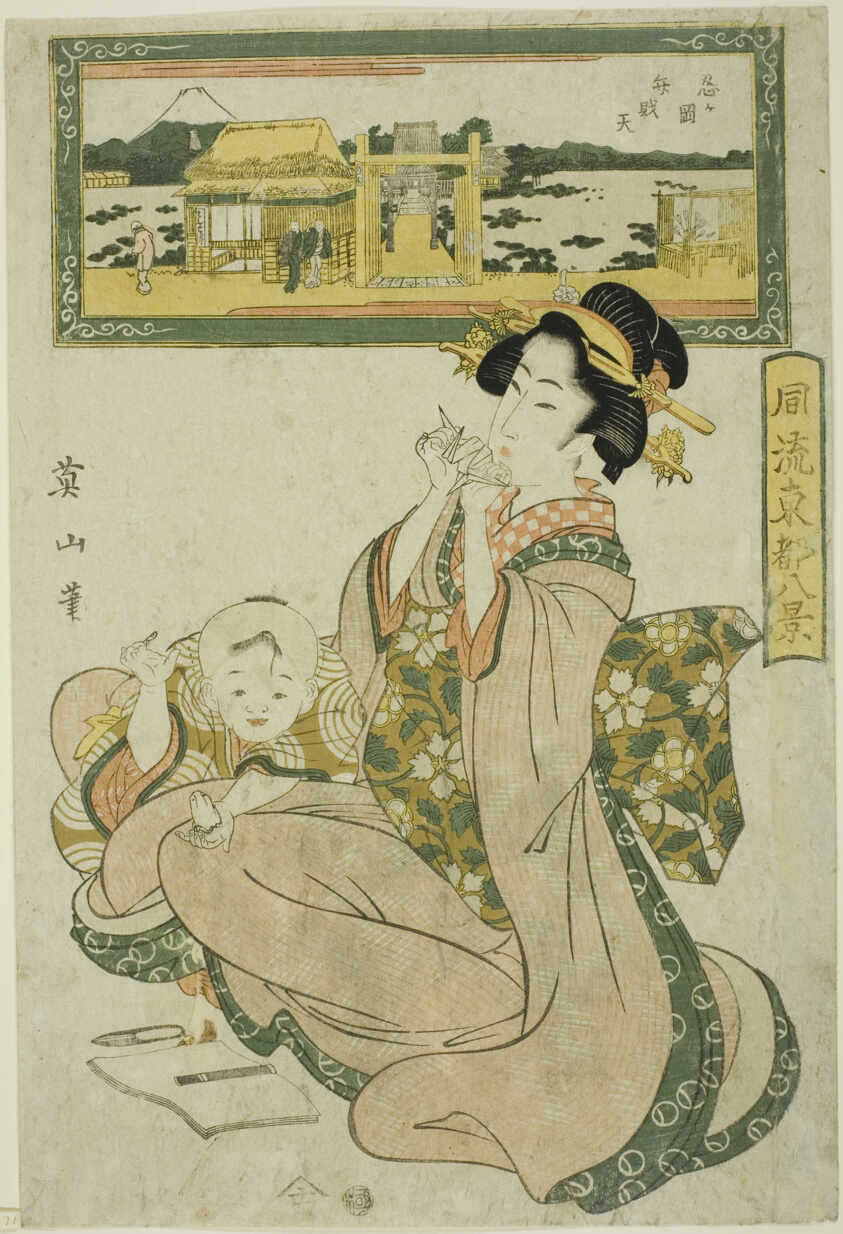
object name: Print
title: Benzaiten Shrine at Shinobugaoka (Shinobugaoka Benzaiten), from the "Fashionable Eight Views of the Eastern Capital (Furyu Toto hakkei)"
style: Japanese (culture or style)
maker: Kikukawa Eizan (Japanese, 1787-1867)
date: c. 1824/29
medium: Color woodblock print; oban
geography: Japan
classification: woodblock print; print; asian art